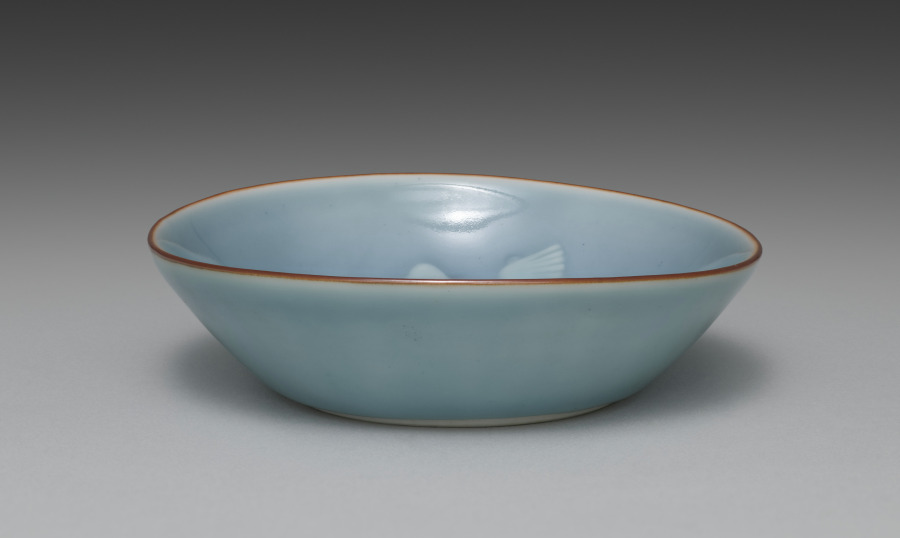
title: Dish from Dishes with Shells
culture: Japan, Taishō period (1912–26)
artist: Seifū Yohei IV (Japanese, 1872–1951)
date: 1914–46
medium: One from a set of five dishes; porcelain with blue glaze, iron oxide, and molded design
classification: Ceramic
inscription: 清風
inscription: 清風造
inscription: 清風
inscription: 成山清風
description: Yohei IV chose an aquatic theme for this set of five mukōzuke, side dishes. He added an iron oxide rim and used a concentrated blue glaze on both the interior and exterior. The glaze, named on the box lid, is his father’s “evening moon” (tsukiyoi) color. The conch in relief takes up the entire bottom of the dish. Up the sides are two snails on one end and on the other a scallop. This results in a boldly graphic, less realistic effect.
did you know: This set of dishes, mukōzuke, could be used for serving small side dishes at a tea gathering.